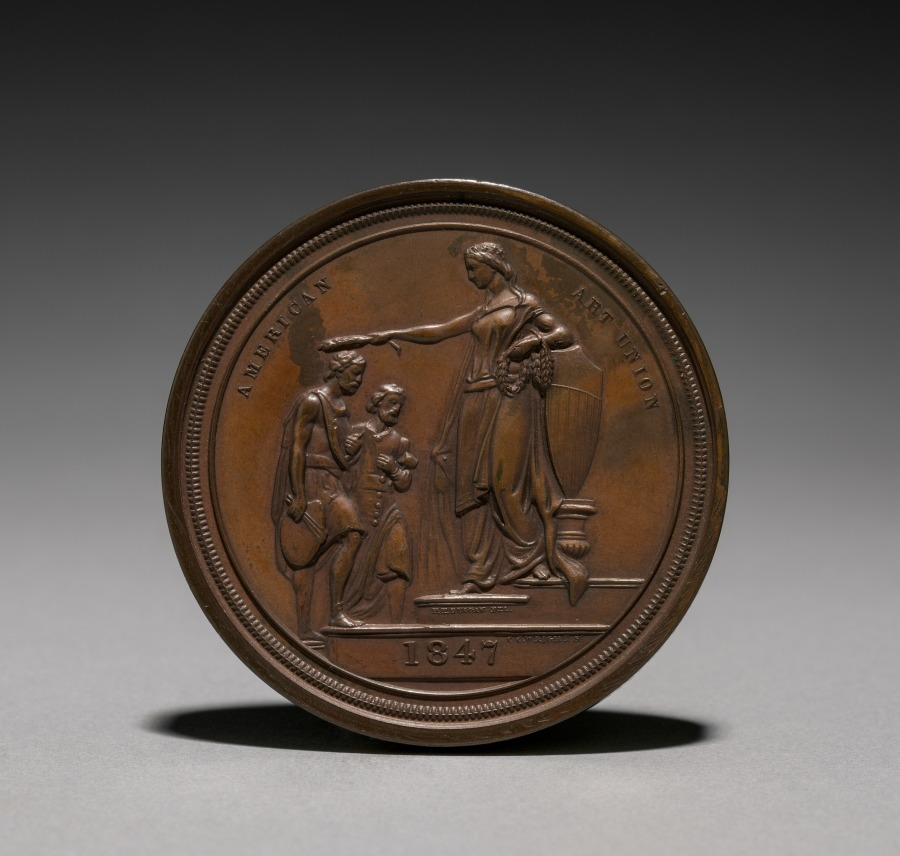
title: Washington Allston Medal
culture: America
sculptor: Charles Cushing Wright (American, 1853)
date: 1847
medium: bronze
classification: Metalwork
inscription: "WASHINGTON ALLSTON."